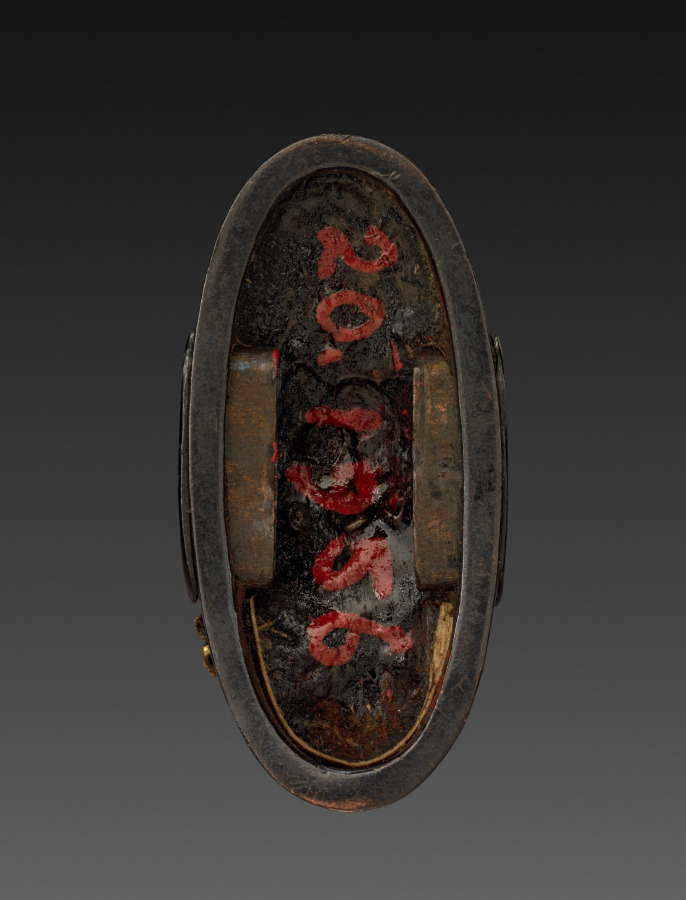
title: Sword-Hilt Pommel (Kashira) with Rice Cultivation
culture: Japan, Edo period (1615–1868)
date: 1700–1850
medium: shibuichi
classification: Arms and Armor